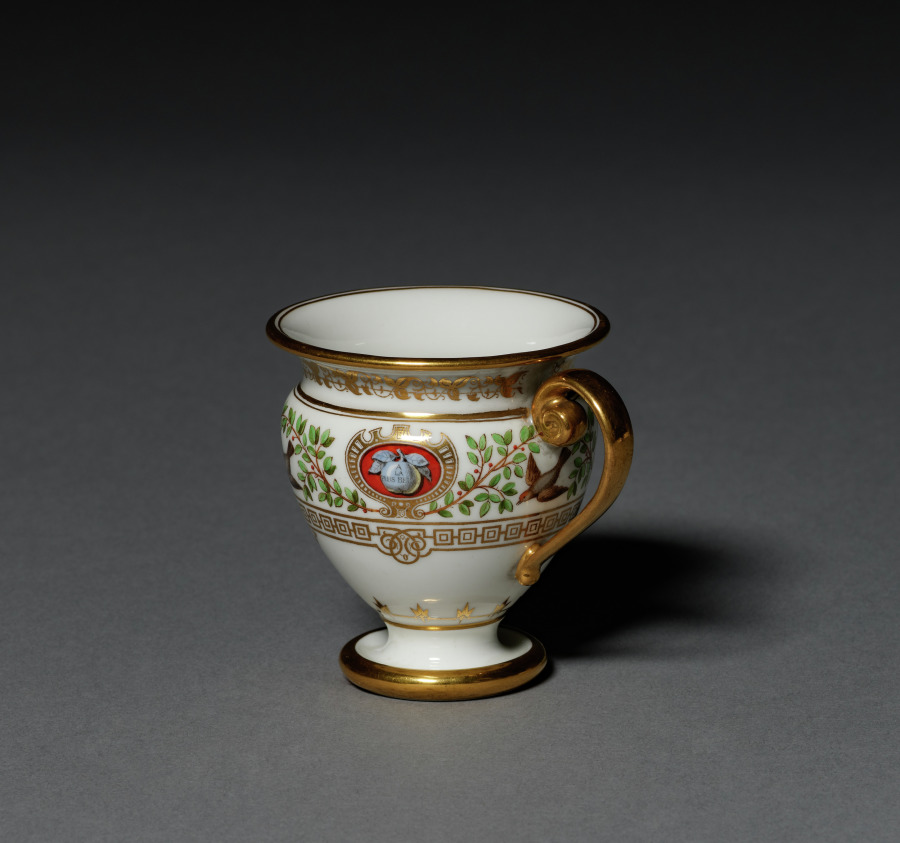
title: Cup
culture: France, Sèvres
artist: Sèvres Porcelain Factory (French, est. 1756)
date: 1839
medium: hard-paste porcelain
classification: Ceramic